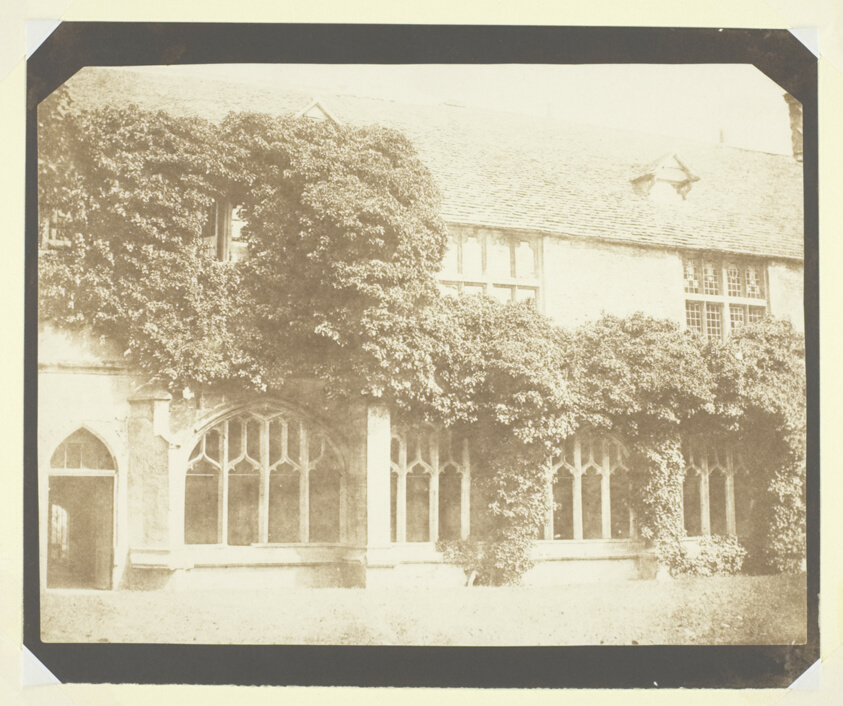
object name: Photograph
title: Cloisters of Lacock Abbey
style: 19th century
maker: William Henry Fox Talbot (English, 1800–1877)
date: c. 1841/44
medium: Salted paper print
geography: England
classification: salted paper print; photographic process; photography; photograph